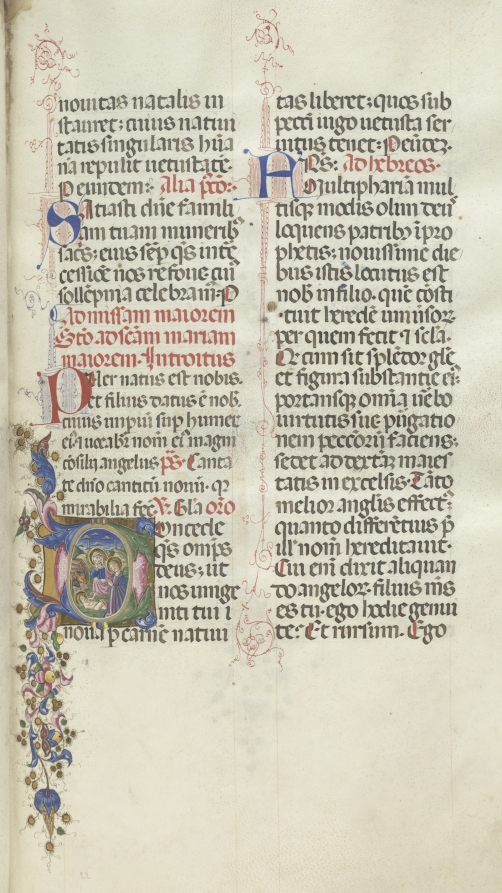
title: Missale: Fol. 22: Nativity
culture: Italy, Perugia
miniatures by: Bartolommeo Caporali (Italian, c. 1420–1503)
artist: assisted by Giapeco Caporali (Italian, d. 1478)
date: 1469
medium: ink, tempera and burnished gold on vellum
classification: Bound Volume